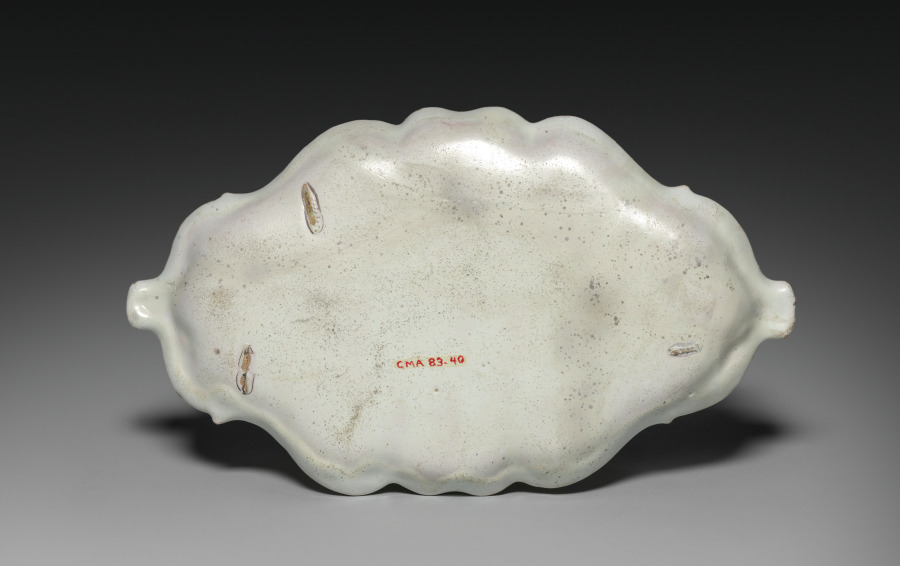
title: Sauce Tureen with Attached Stand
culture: France, Marseilles, 18th century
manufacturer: Veuve Perrin Factory (French)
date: c. 1765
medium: tin-glazed earthenware (faience) with enamel decoration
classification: Ceramic